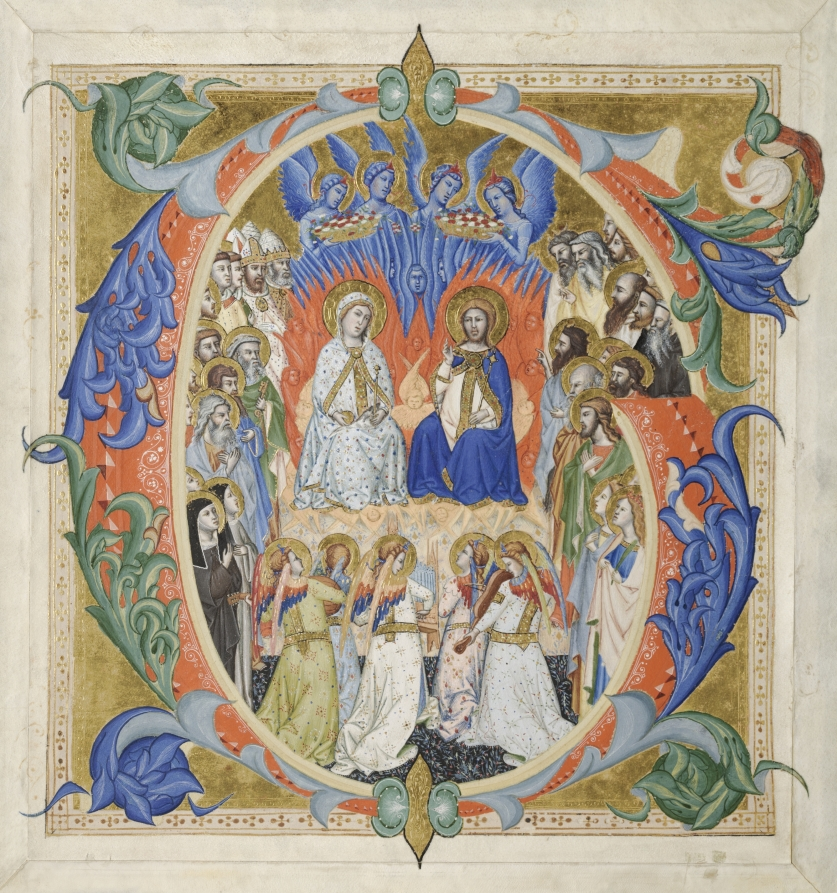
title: Initial G[audeamus omnes] from a Gradual: The Court of Heaven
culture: Italy, Florence, 14th century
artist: Don Silvestro dei Gherarducci (Italian, 1339–1399)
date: 1371–77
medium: ink, tempera, and gold on vellum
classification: Manuscript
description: This elegant and colorful initial G comes from a multivolume set of choral books illuminated by Don Silvestro, a Camaldolese monk, for his monastery of Santa Maria degli Angeli in Florence. In the original book, this initial would have introduced the text: Gaudeamus omnes in Domino (“Let us rejoice in the Lord”), the beginning of Introit, the introduction, for the Feast of All Saints on November 1. This beautiful initial is generally considered to be the artist’s masterpiece.